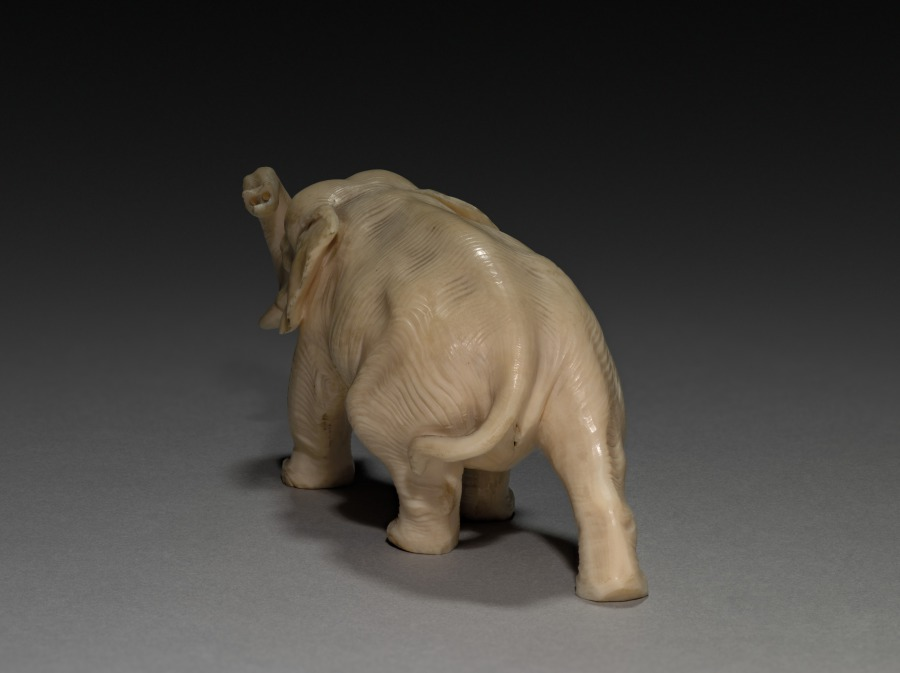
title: Elephant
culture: Japan, Meiji period (1868–1912)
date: early 1900s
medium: ivory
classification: Ivory